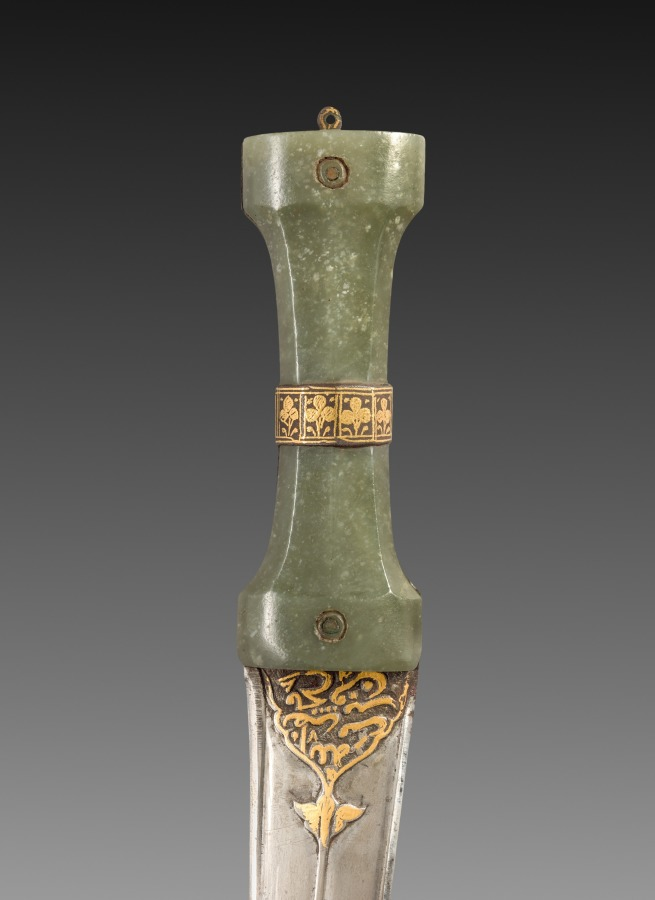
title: Dagger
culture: India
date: 1700s–1800s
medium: Jade hilt with iron and gold; steel blade with iron and gold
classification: Arms and Armor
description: Daggers with curved blades, known as khanjar, were worn tucked into the belt as one of the basic accessories for Mughal men. An all-purpose knife that could be used in hunting or fighting, the khanjar was also a visible status symbol. The use of jade and gold indicates that this dagger was owned by a member of the court. The gold inscriptions on the blade, just under the hilt, are quotations from the Qur’an, the most sacred book for Muslims. On one side is the opening line: “In the Name of God the Merciful and the Compassionate,” and on the other is a popular verse from chapter (sura) 61: “Help comes from God, and Victory is imminent.”